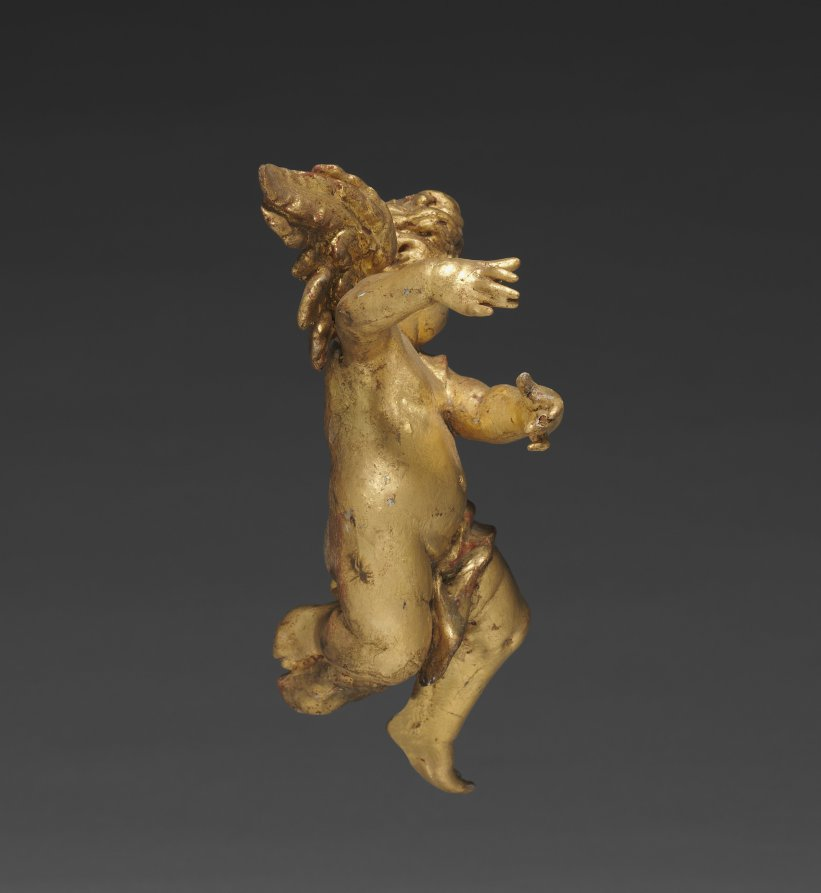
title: Altarpiece with Relics - Putto with column, upper right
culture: Germany, Bavaria, 18th century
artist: Joseph Matthias Götz (German, 1696–1760)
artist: and Workshop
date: 1735–1740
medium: gilded wood, with relics in niches: gilded wood, mother-of-pearl, ebony, red silk, gold wire, seed pearls, rock crystal, pen and ink on paper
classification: Sculpture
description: Götz covers every surface in gold leaf, giving each part of the object equal importance, rather than simply framing a central picture. In this distinctively Central European approach, figural narrative is subordinate to the overall ensemble. Götz designed this object to rest on top of an altar, probably in front of a larger painted or sculpted decorative scheme. The work contains relics seen through the small windows on the perimeter. These small remains of holy figures demonstrate the persistence of a medieval Catholic tradition well into the 1700s.